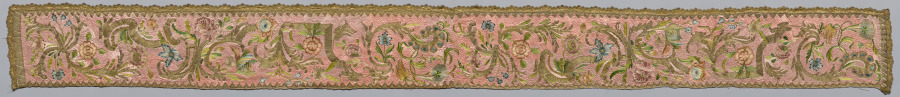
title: Embroidered Strip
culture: Italy, 18th century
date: 1700s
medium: embroidery, silk and gold thread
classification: Embroidery